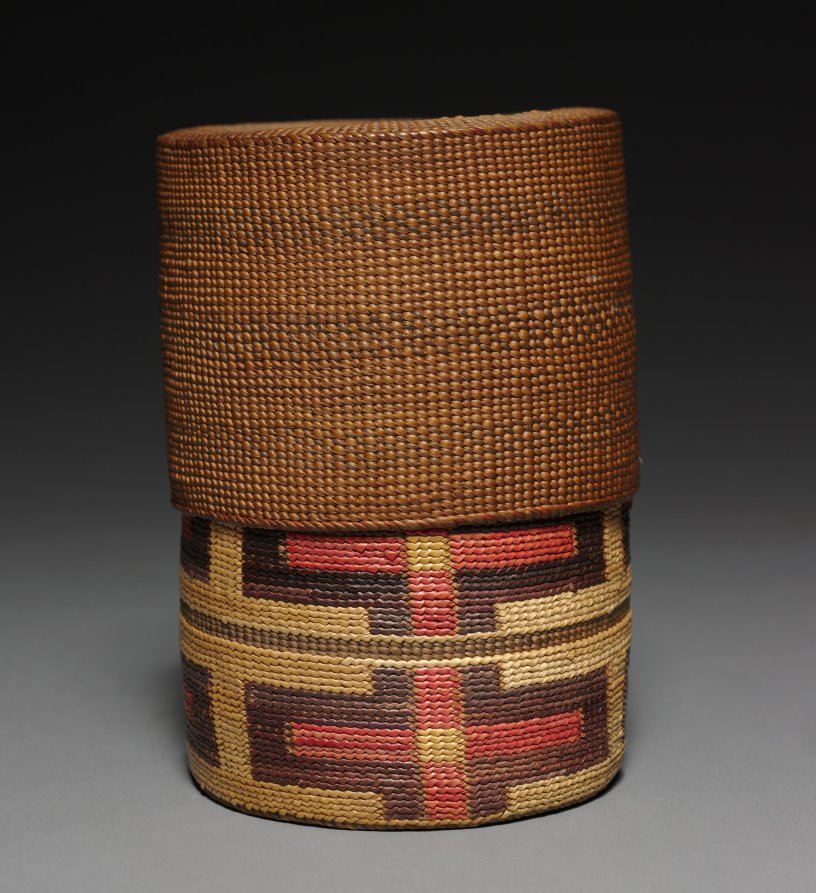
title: Telescoping basket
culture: Northwest Coast, Tlingit, 19th century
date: 1800's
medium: twined spruce root with grass false embroidery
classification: Basketry